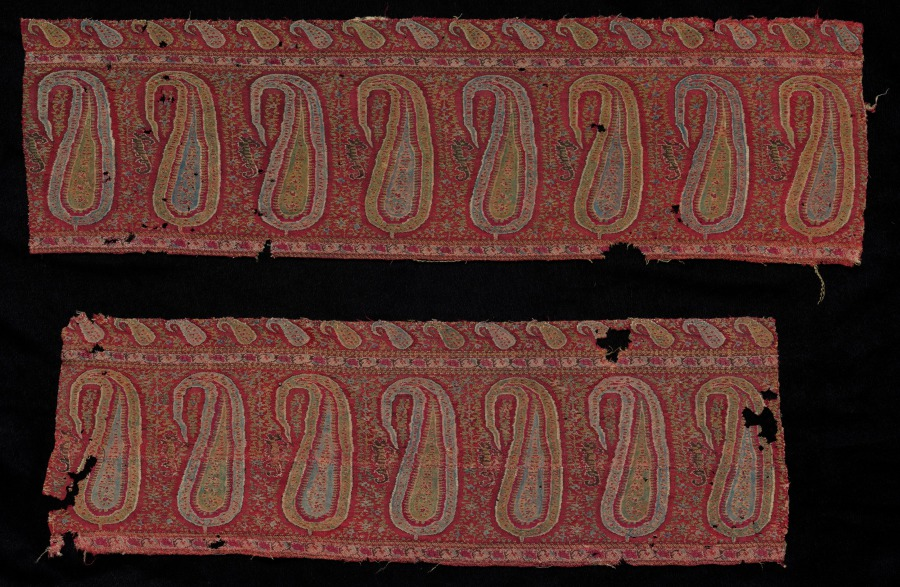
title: Border of a Shawl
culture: India, Punjab, 19th century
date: 1800s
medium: tapestry twill; wool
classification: Textile